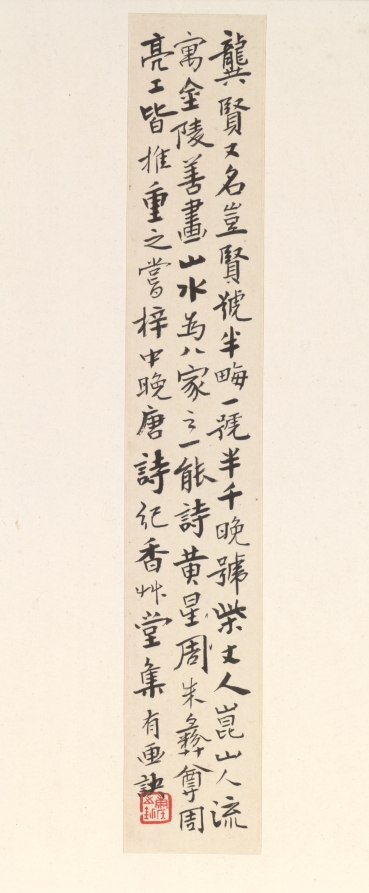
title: Summer in the Water Country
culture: China, Qing dynasty (1644-1911)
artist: Gong Xian (Chinese, 1599–1689)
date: 1670s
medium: Album leaf; ink on paper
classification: Painting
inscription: Artist's seal: Ban qian 半千. 1 additional seal unidentified.